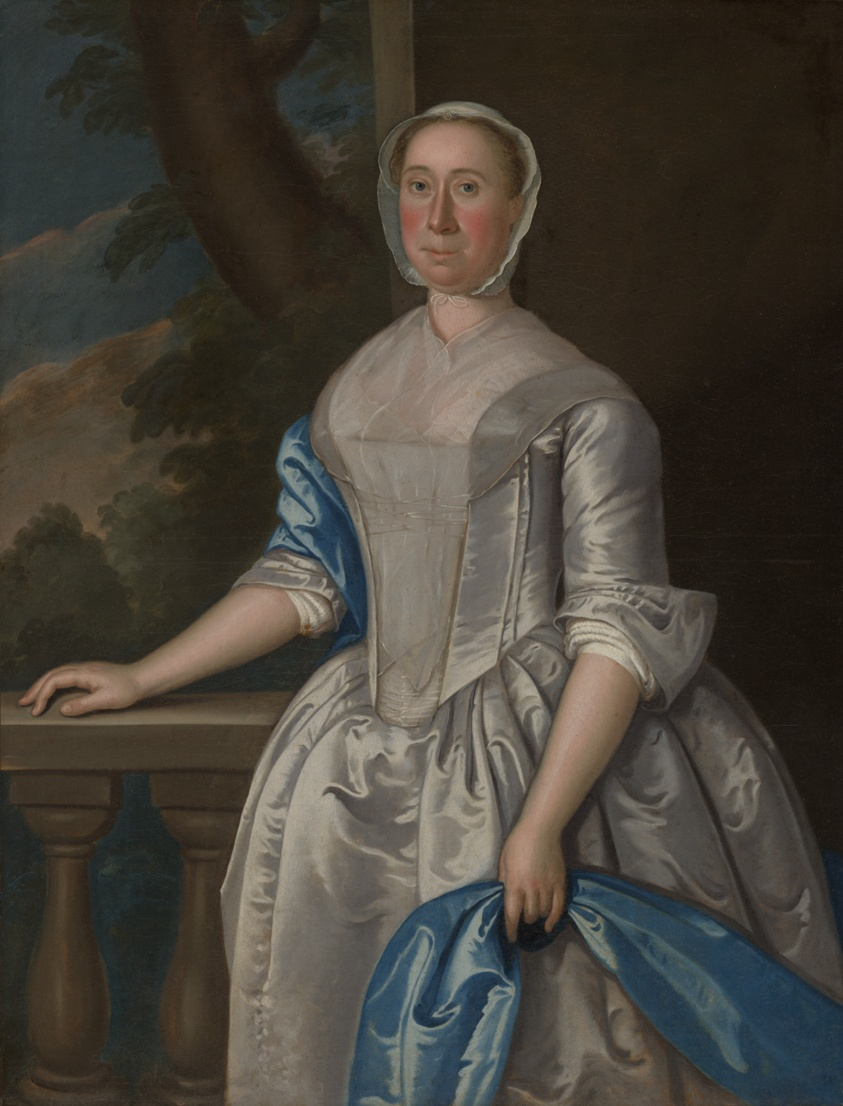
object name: Painting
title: Mrs. Thomas Sprigg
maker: John Hesselius (American, 1728–1778)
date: 1764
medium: Oil on canvas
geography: United States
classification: painting; american arts